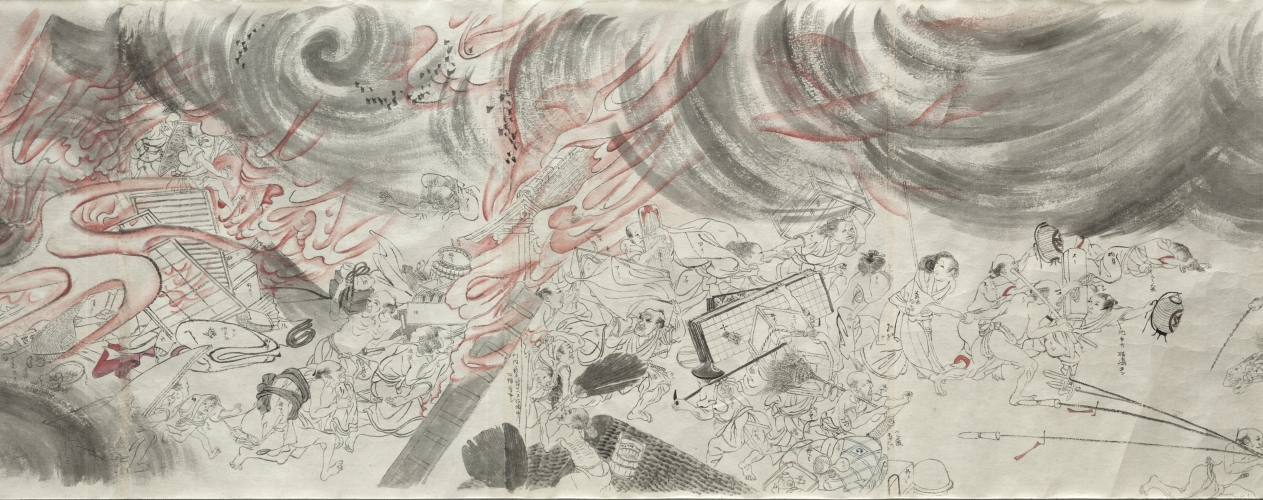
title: Sketch Copy of Natural Disasters, from the Seven Fortunes and Misfortunes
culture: Japan, Edo period (1615–1868) to Meiji period (1868–1912)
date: after 1773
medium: handscroll; ink and color on paper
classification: Painting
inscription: Signed: Gettcho; dated 1773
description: This unmounted handscroll is a copy of the first of a three-scroll set painted by Maruyama Ōkyo (1733–1795) for Buddhist monk Yujō (1723–1773). It depicts people's unfortunate encounters with forces of nature from wind to beasts. Ōkyo's realistic, contemporary imagery was meant to evoke a sense of recognition and empathy in viewers, shocking them into avoidance of possible punishments.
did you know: Notations that appear throughout the scroll indicate colors and other details of the original painting.